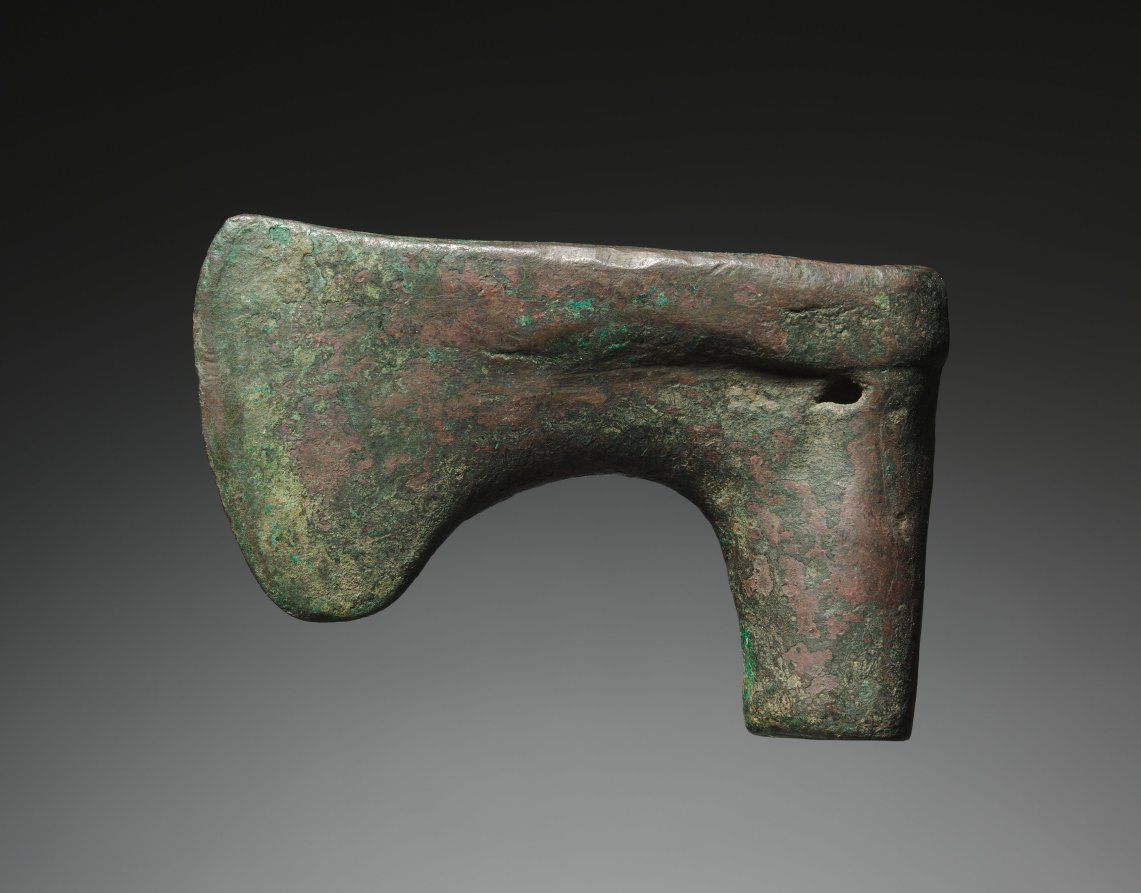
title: Domestic Axe-Head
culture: Iran, Luristan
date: 2000–1000 BCE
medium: bronze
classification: Metalwork